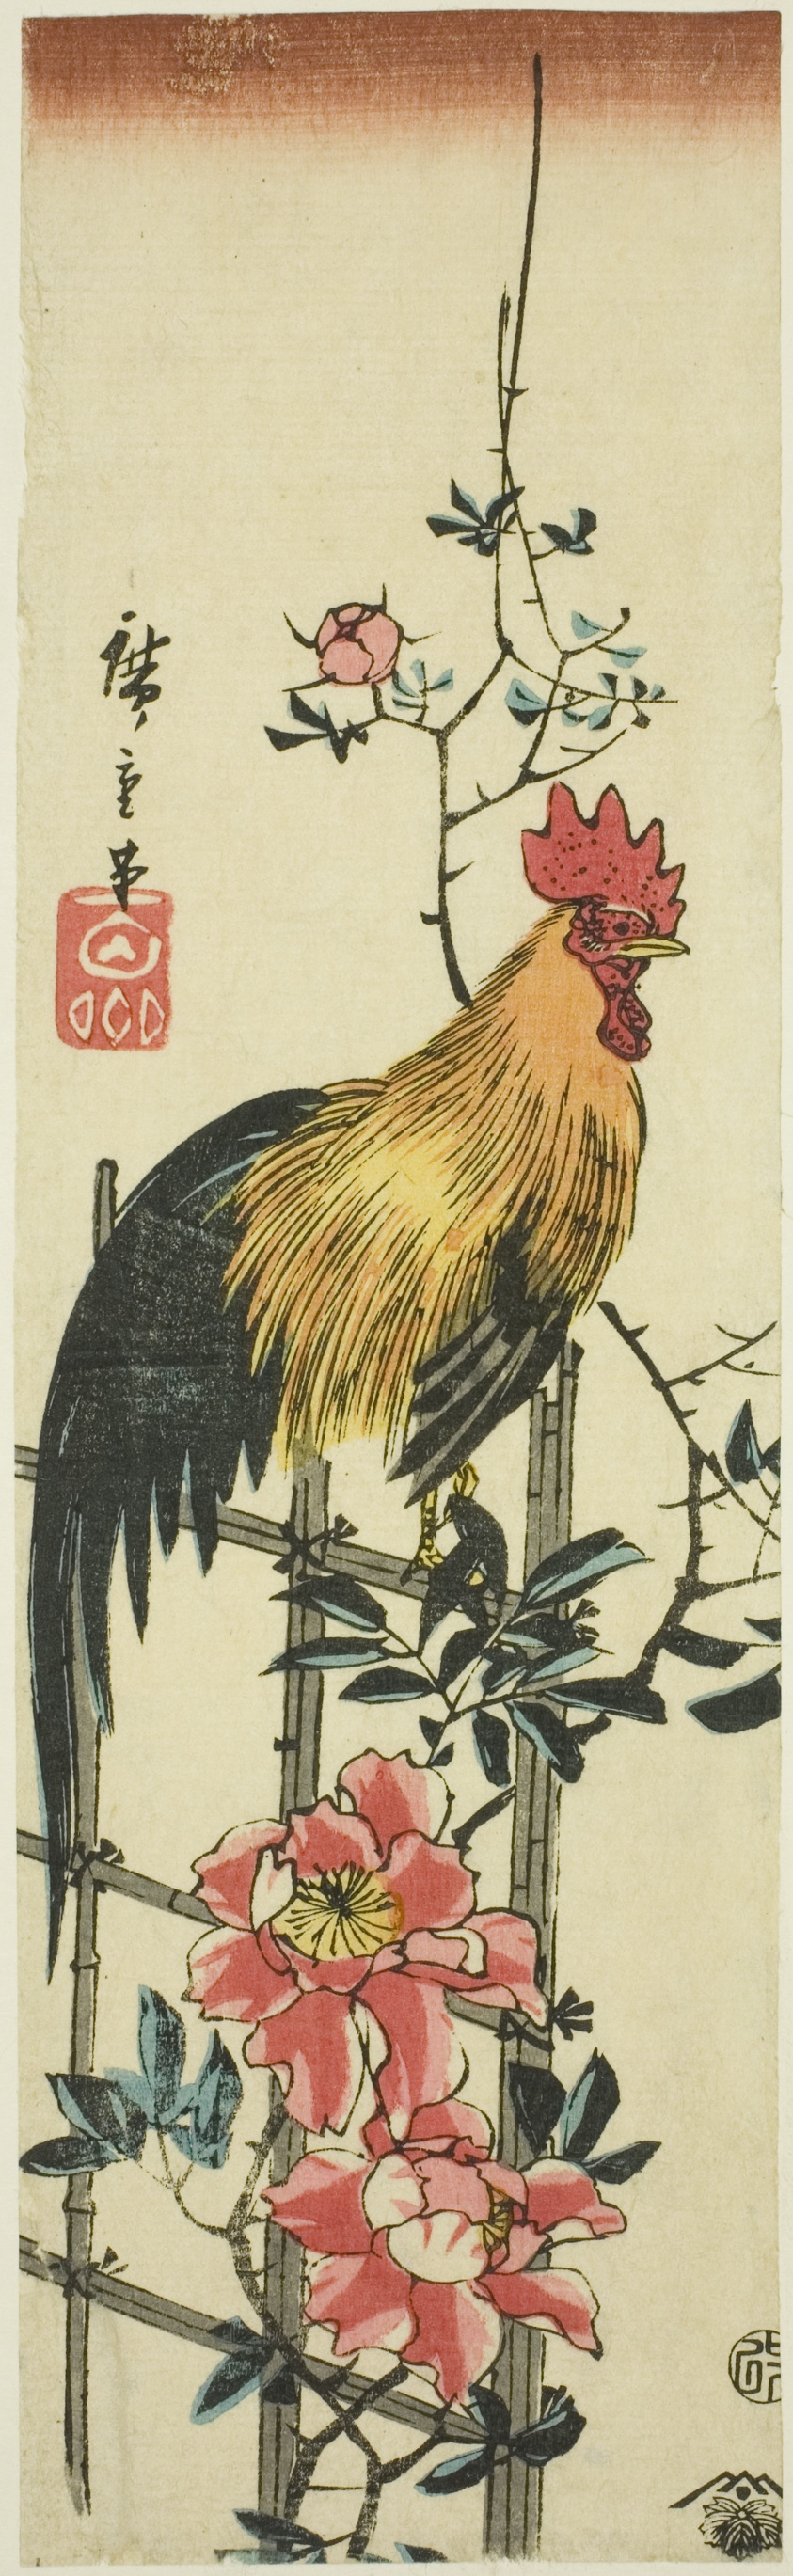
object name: Print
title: Rooster perched on rose trellis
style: Japanese (culture or style)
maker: Utagawa Hiroshige 歌川 広重; Japanese, 1797-1858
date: 1854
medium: Color woodblock print; aitanzaku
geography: Japan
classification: woodblock print; print; asian art